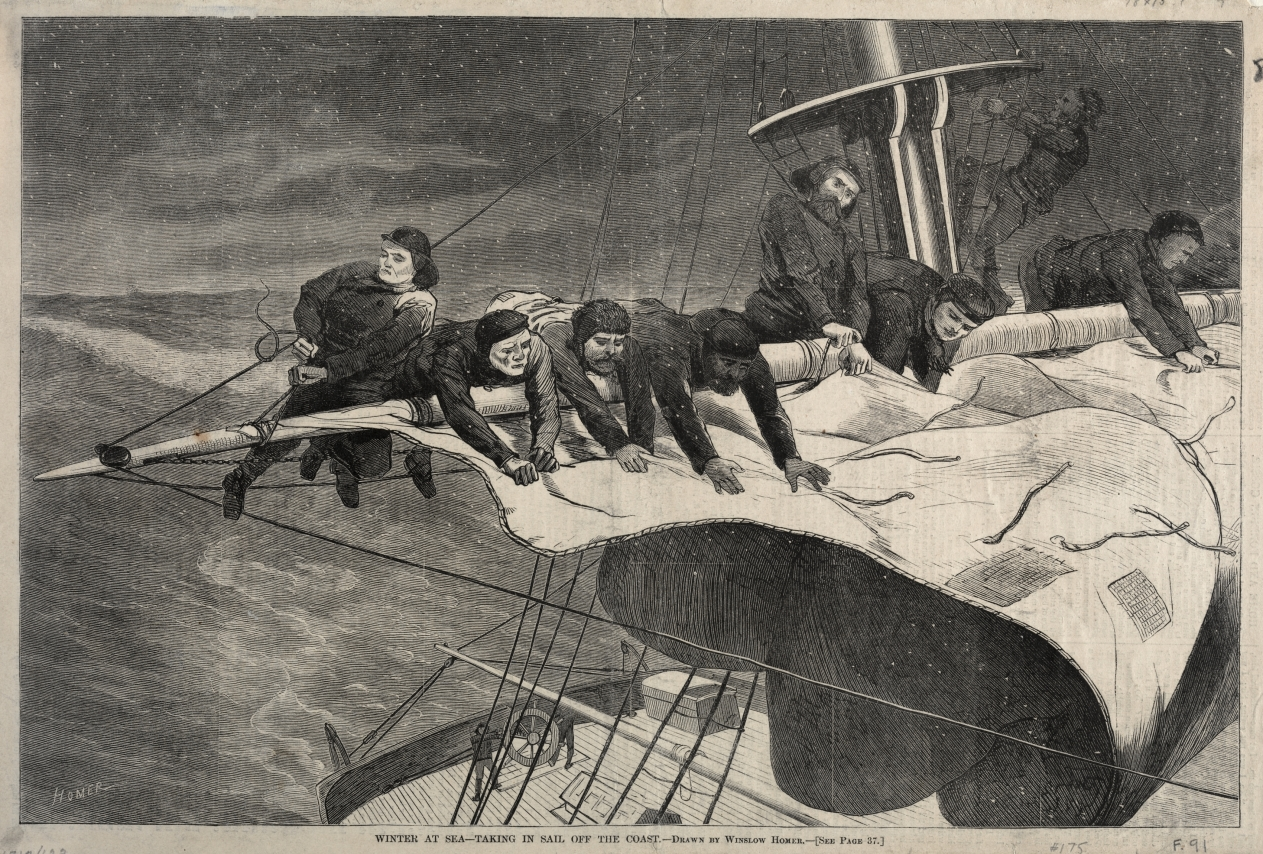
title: Winter at Sea - Taking in Sail Off the Coast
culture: America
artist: Winslow Homer (American, 1836–1910)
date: 1869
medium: wood engraving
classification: Print